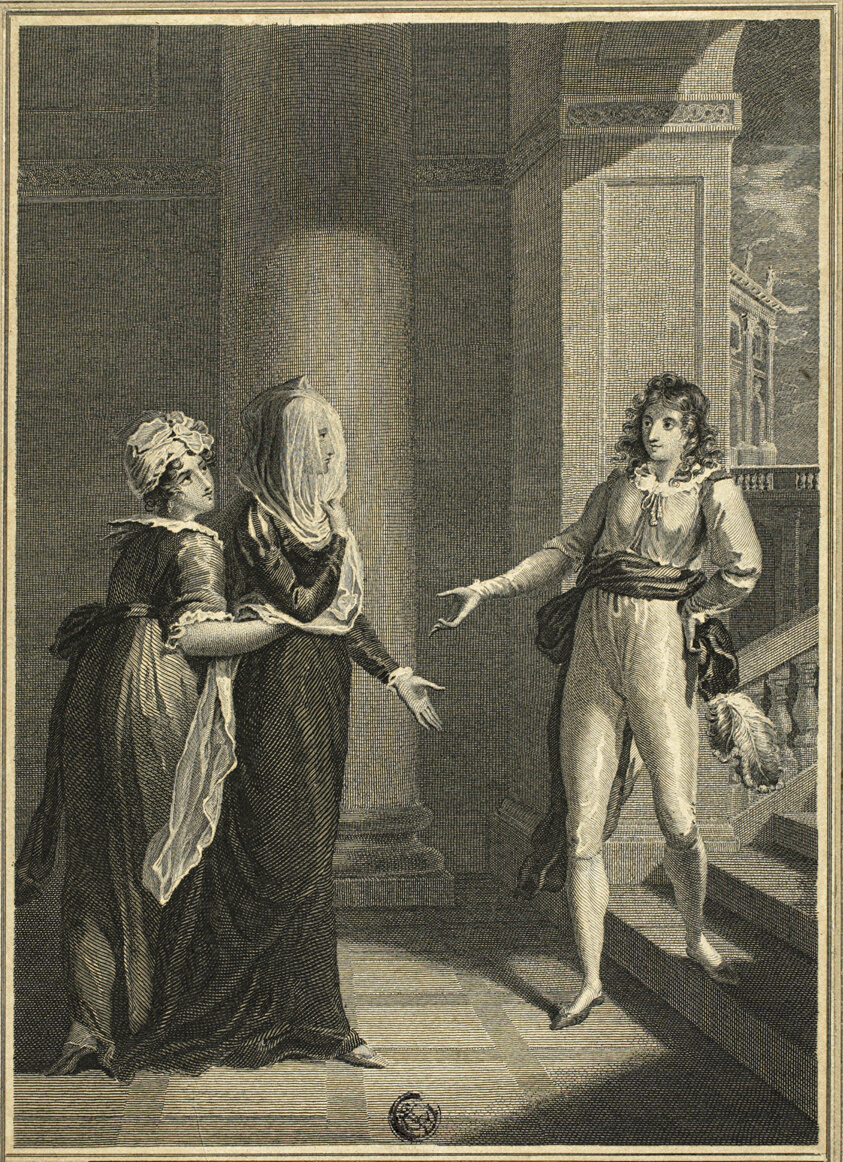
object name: Print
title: Olivia and Viola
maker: William Hamilton (English, 1751-1801)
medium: Engraving on paper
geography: England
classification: engraving; print; prints and drawing